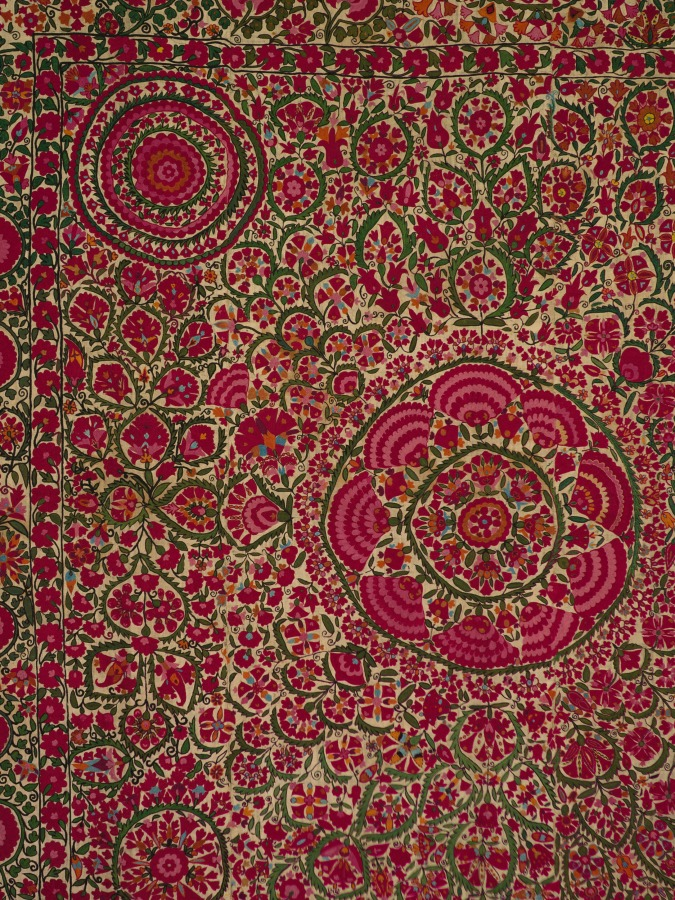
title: Curtain or bedcover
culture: Tajikistan, Ura Tube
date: early 1800s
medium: plain weave: cotton; embroidery: silk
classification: Embroidery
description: Known as suzani, embroideries with elaborate floral decoration from Central Asia were a significant part of a bride’s dowry and were ceremoniously displayed on special occasions. Women embroidered suzani, mothers passing their skills on to their daughters. Floral and foliate motifs generally dominate, emboldened with several shades of red and multiple borders, perhaps conveying cosmological, medicinal, or fertility associations. However, few display a more bountiful blossoming garden than seen here. Flora radiates from the central fanlike bouquet, a design echoed in the corners of the field and in the wide border, characteristic of work from Bukhara, Uzbekistan. Patterns were drawn on several loosely joined cotton cloths and then embroidered in chain stitch.